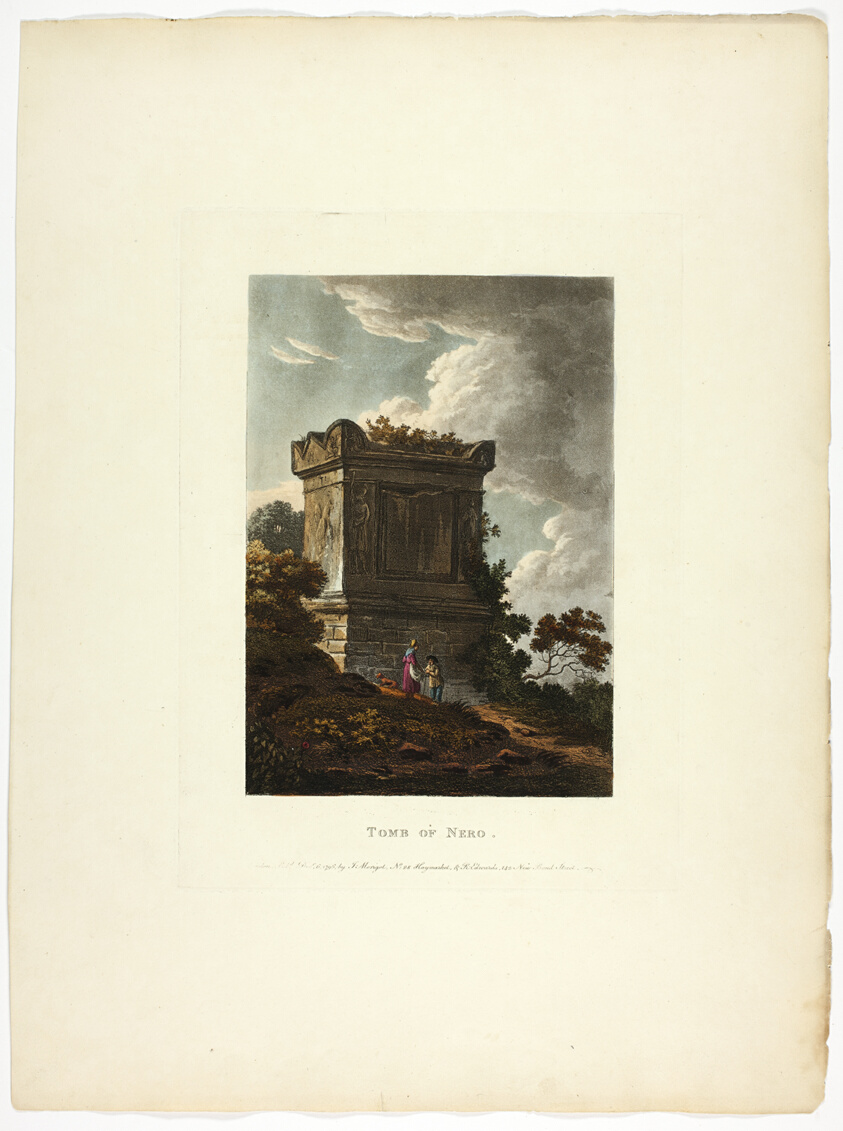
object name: Print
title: Tomb of Nero, plate 7 from the Ruins of Rome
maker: M. Dubourg, (English, active 1786-1838); published by J. Merigot (Italian, Unknown)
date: published December 6, 1796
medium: Hand-colored aquatint on paper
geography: England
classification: aquatint; print; prints and drawing